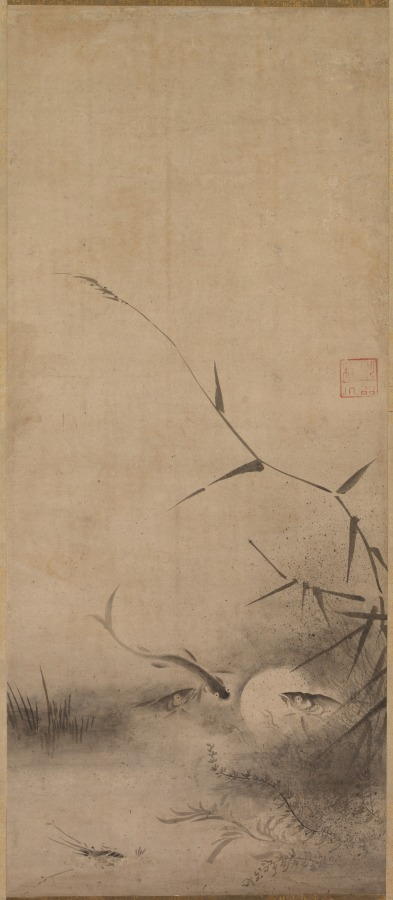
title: Fish and Seaweed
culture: Japan, Momoyama period (1573–1615)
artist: Rinkyo (Japanese)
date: 1573–1615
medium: one of a pair of hanging scrolls; ink on paper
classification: Painting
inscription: artist's seal at mid-right edge of painting.